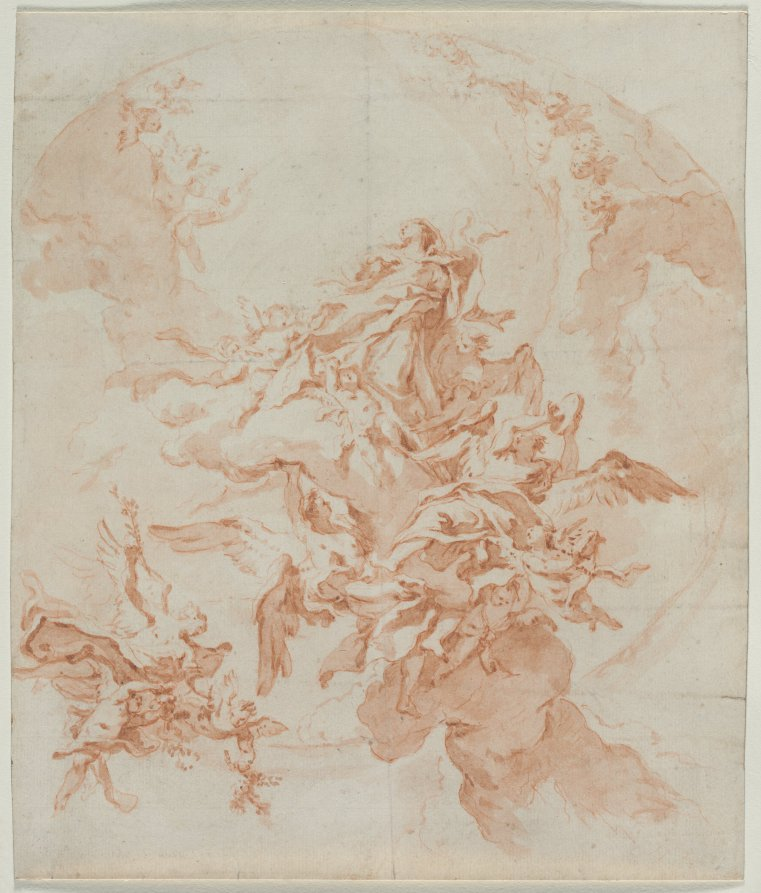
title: The Assumption of the Virgin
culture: Italy, 18th century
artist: Carlo Innocenzo Carlone (Italian, 1686–1775)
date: c. 1754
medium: red chalk and brush and red chalk wash over traces of black chalk; squared in black chalk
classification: Drawing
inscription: VERSO, lower right, in graphite: f[raming?] 13. / ALMOND / L/W / TRIM TOP F/M / [symbol: square] UP BOTTOM